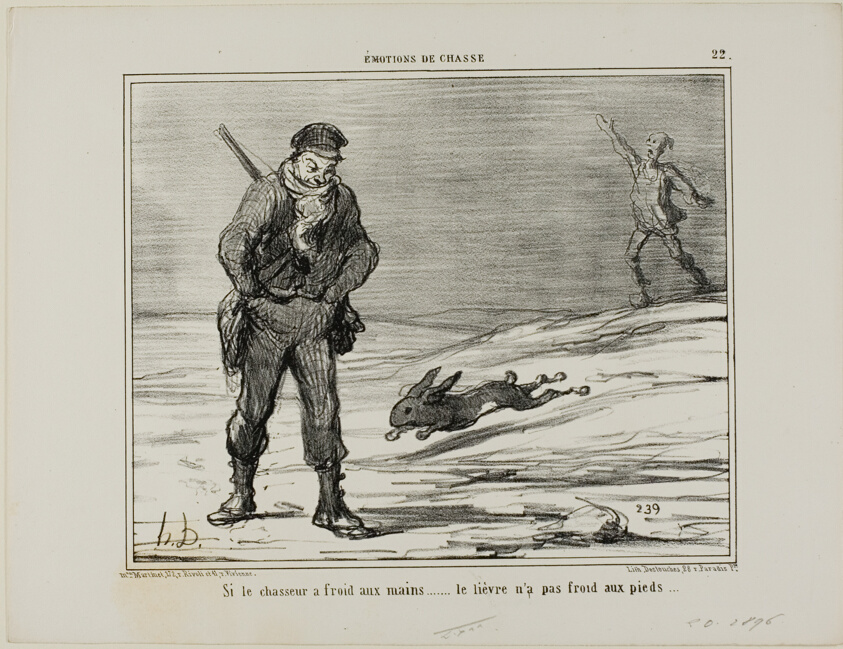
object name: Print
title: If the Hunter has Cold Hands... the hare doesn't have cold feet, plate 22 from Émotions De Chasse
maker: Honoré Victorin Daumier; French, 1808-1879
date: 1858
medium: Lithograph in black on white wove paper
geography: France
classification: lithograph; print; prints and drawing